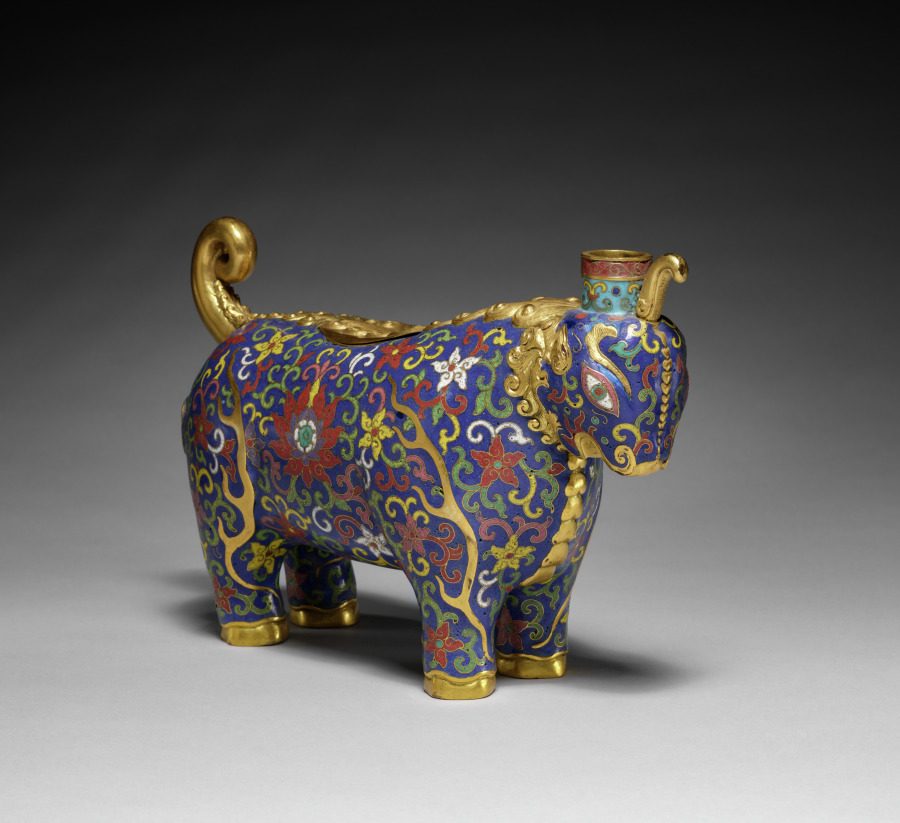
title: Container in the Form of a Unicorn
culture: China, Qing dynasty (1644-1911), Qianlong mark and reign (1736-95)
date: 1736–95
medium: cloisonné enamel and gilt copper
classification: Enamel